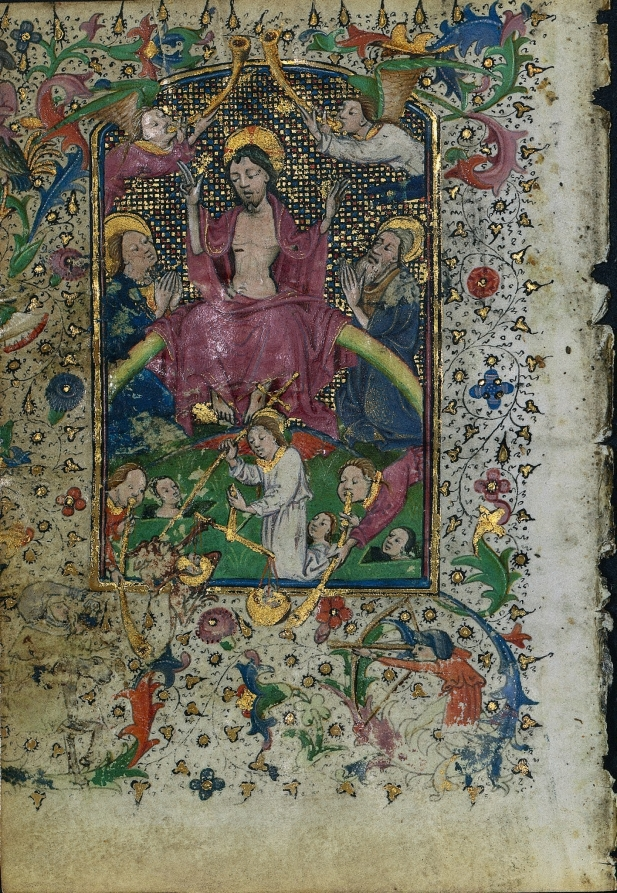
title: Leaf from a Book of Hours: The Last Judgment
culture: Flanders, Ghent (?), 15th century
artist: Master of Guillebert de Mets (Flemish)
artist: and Workshop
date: 1430s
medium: ink, tempera and gold on vellum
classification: Manuscript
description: The Master of Guillebert de Mets is named after the scribe who records his name in an illuminated copy of the Decameron, made for Duke Philip the Good of Burgundy, and for which he contributed many of its miniatures. He was active from about 1410 to 1445. So far there is no proof that allows us to follow his career or to know precisely where he worked. Calendars in other manuscripts with which he is associated suggest his shop may have been in Tournai, Liège, Bruges, and more credibly, Ghent. His commissions may have been linked to the itinerant Burgundian court, though no original provenance survives for any of his manuscripts. The Master of Guillebert de Mets painted in an easily recognizable style. His figures have prominent heads with well-delineated eyes and small mouths, slender torsos with thin, spindly legs, and long, finely worked fingers. Many of his miniatures, such as the Crucifixion and the Last Judgment here, show that he often favored mosaic backgrounds of delicately worked checkered patterns.